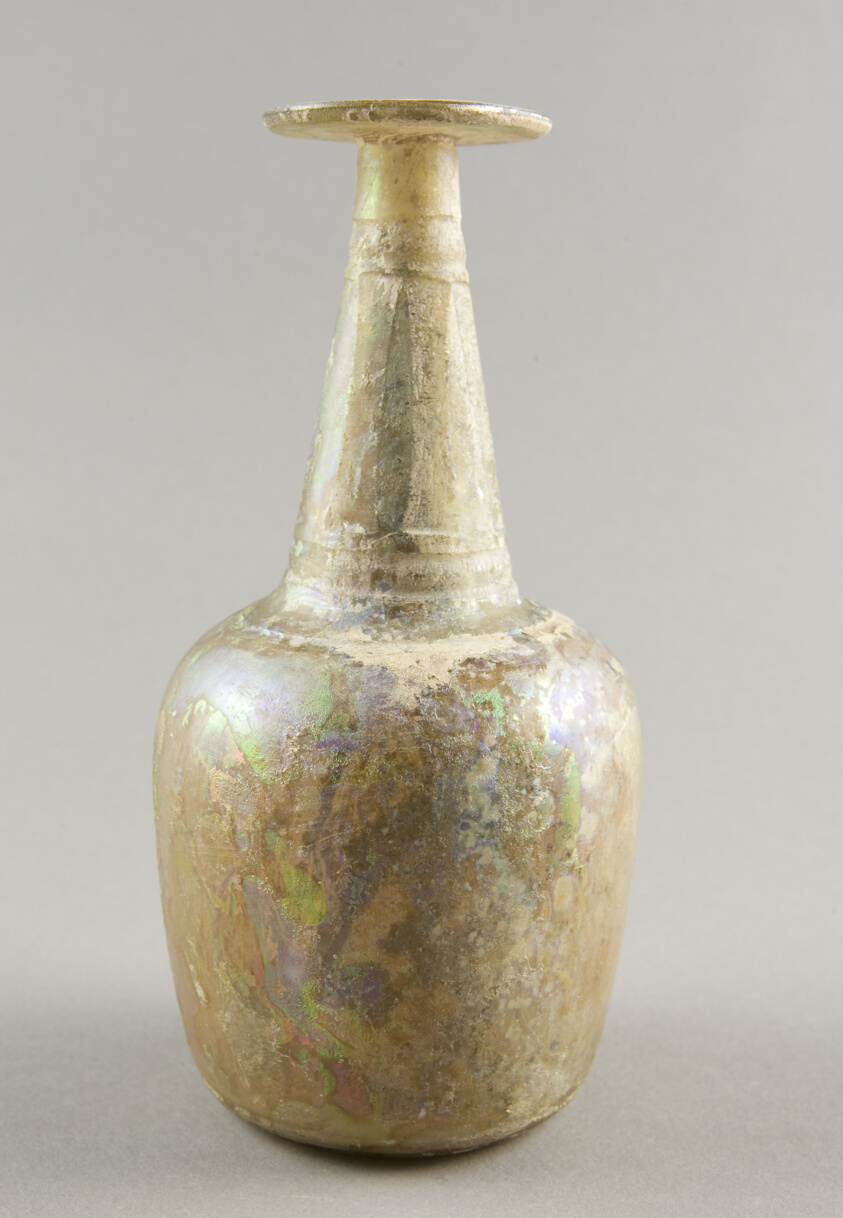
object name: Vessel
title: Bottle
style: syrian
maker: Islamic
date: 9th-11th century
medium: Glass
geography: Syria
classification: glass; vessel; ancient art